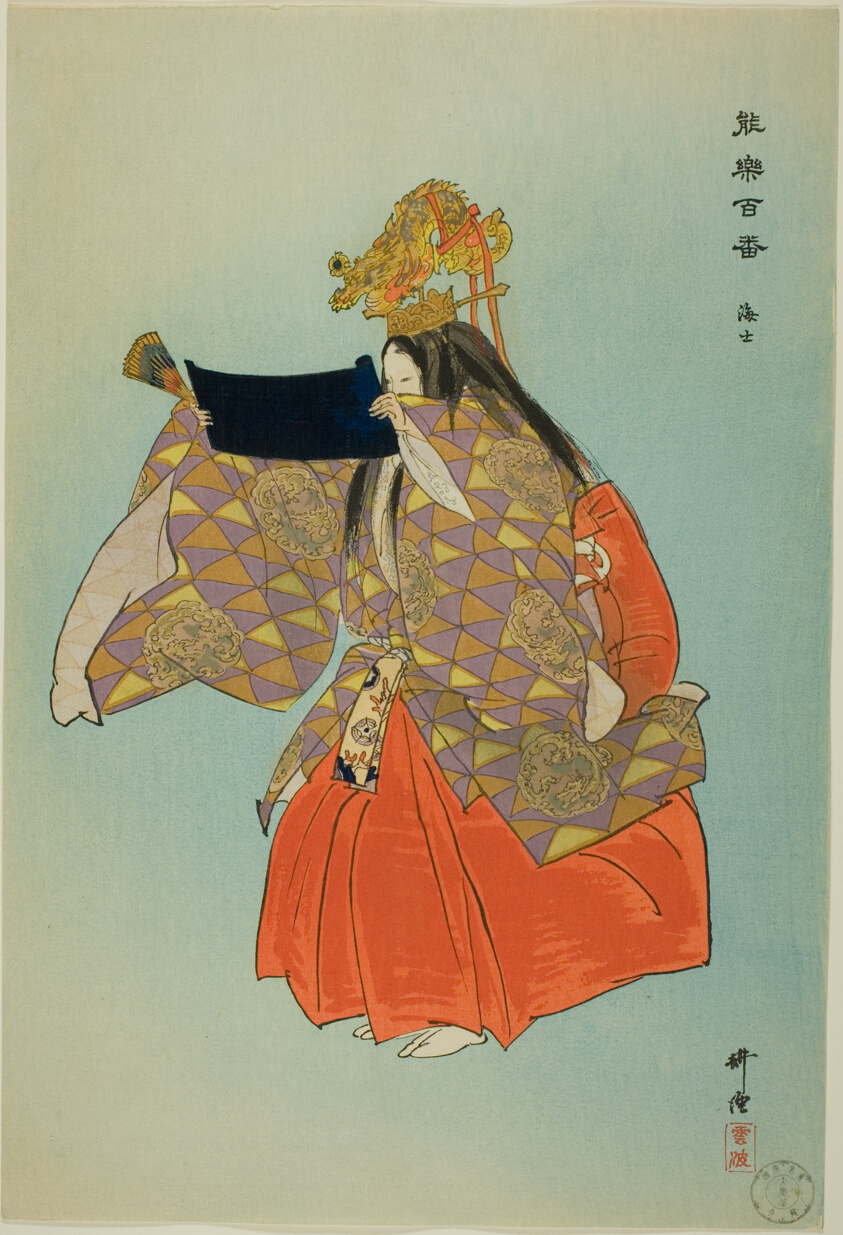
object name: Print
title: Ama, from the series "One Hundred No Dramas (Nogaku hyakuban)"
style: Japanese (culture or style)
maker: Tsukioka Kogyo; Japanese, 1869-1927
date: 1898/1903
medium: Color woodblock print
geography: Japan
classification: woodblock print; print; asian art